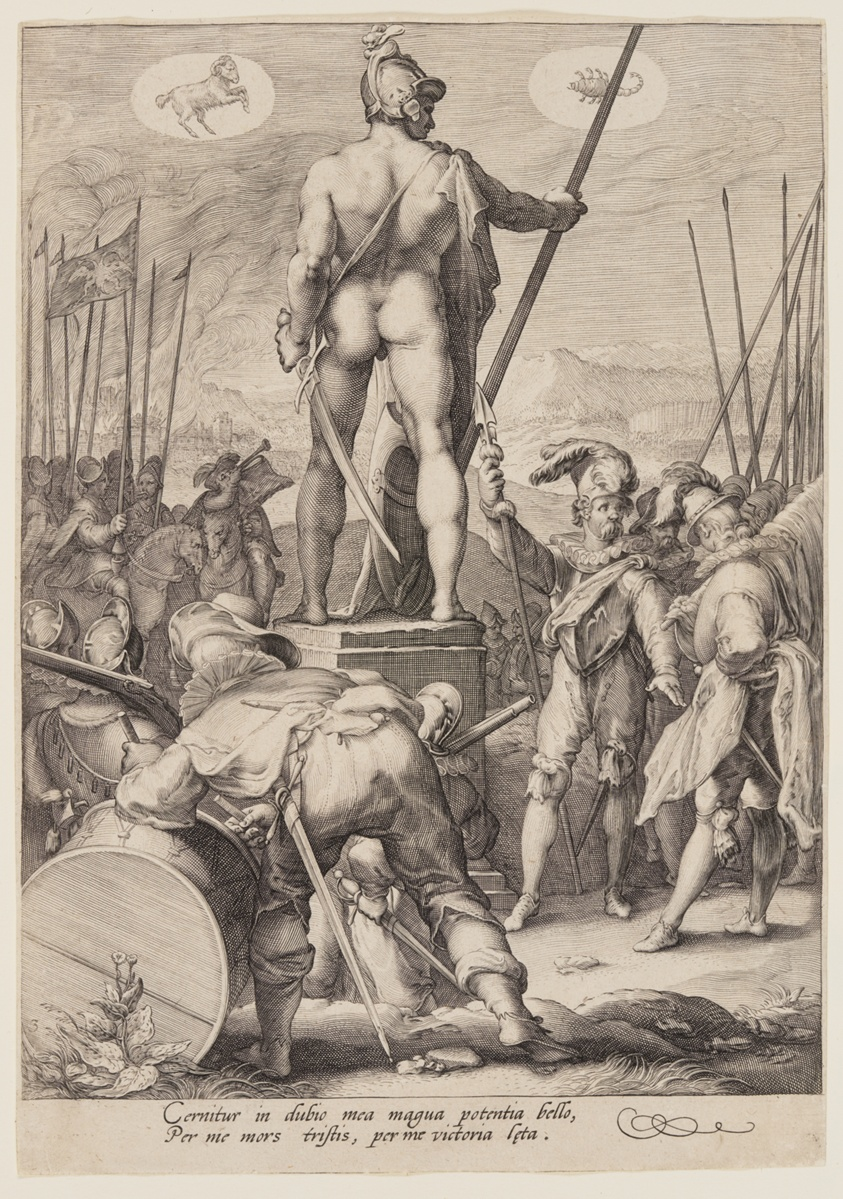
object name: Print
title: Mars Presiding over the Arts of War, from Seven Planetary Gods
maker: Jan Saenredam (Dutch, 1565–1607); after Hendrick Goltzius (Dutch, 1558–1617)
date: 1596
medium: Engraving on ivory laid paper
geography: Netherlands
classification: engraving; paper; print; prints and drawing